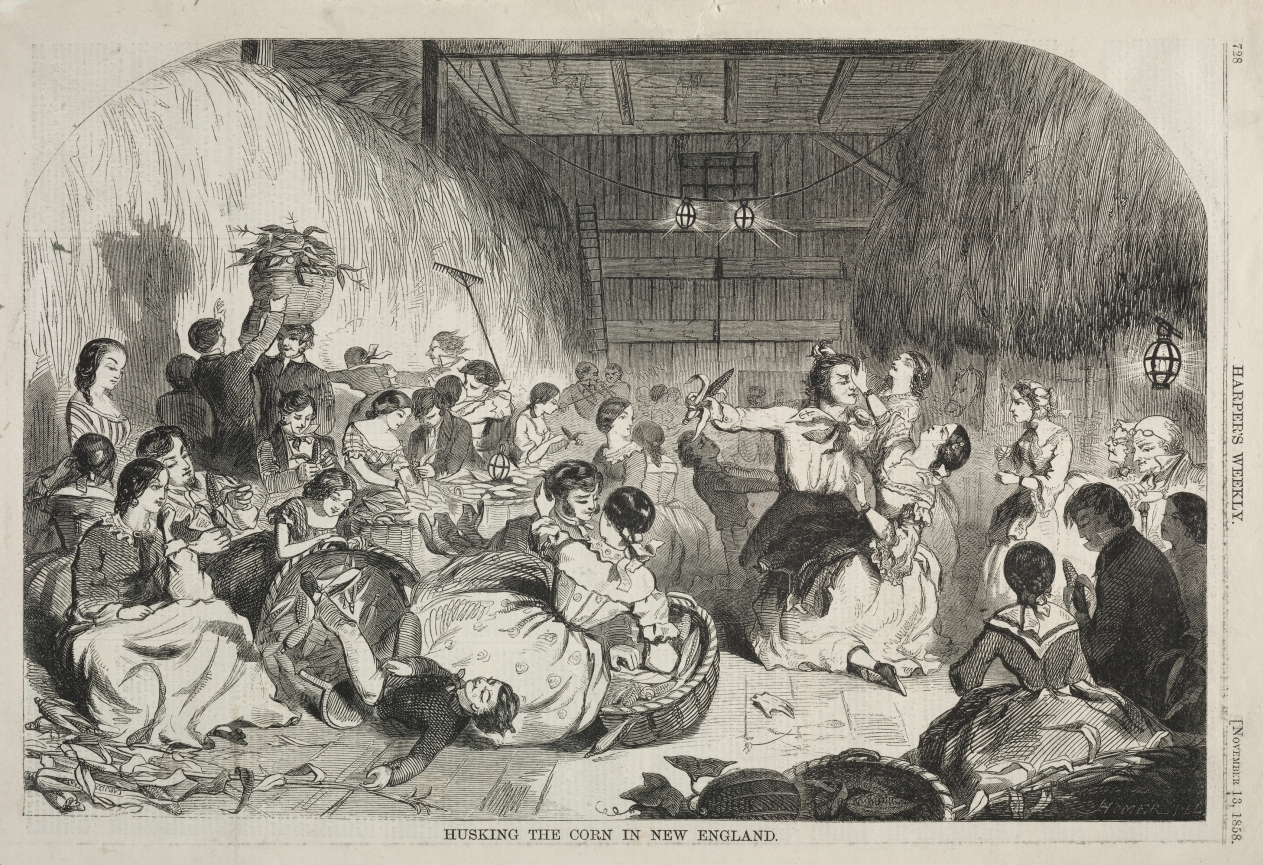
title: Husking the Corn in New England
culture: America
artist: Winslow Homer (American, 1836–1910)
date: 1858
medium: wood engraving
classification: Print